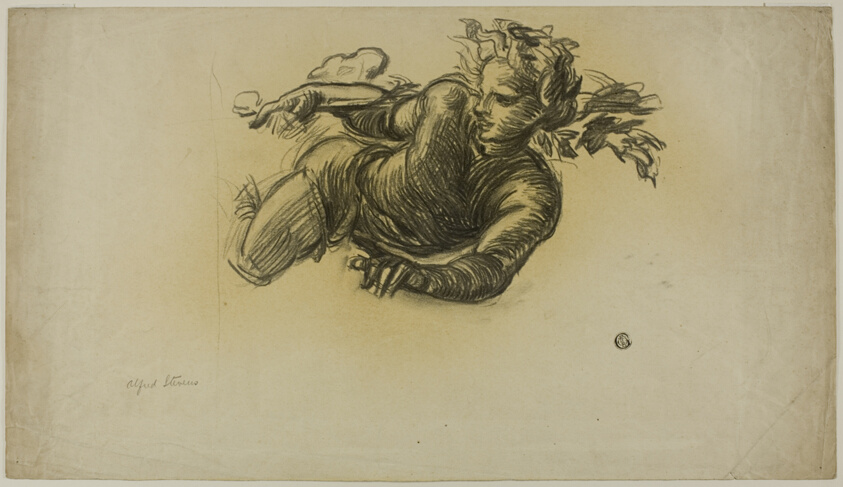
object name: Drawing and Watercolor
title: Flying Figure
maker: Alfred George Stevens (English, c.1817-1875)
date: 1837/75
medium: Charcoal on cream wove paper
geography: England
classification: charcoal; drawings (visual works); prints and drawing